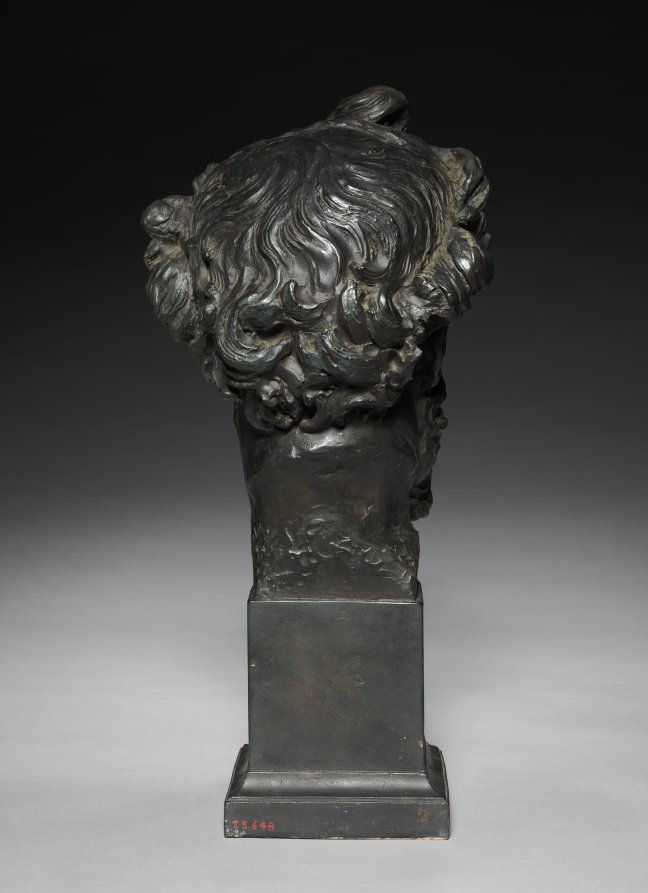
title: Head of Alphonse Legros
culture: France, 19th century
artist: Jules Dalou (French, 1838–1902)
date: c. 1876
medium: bronze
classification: Sculpture